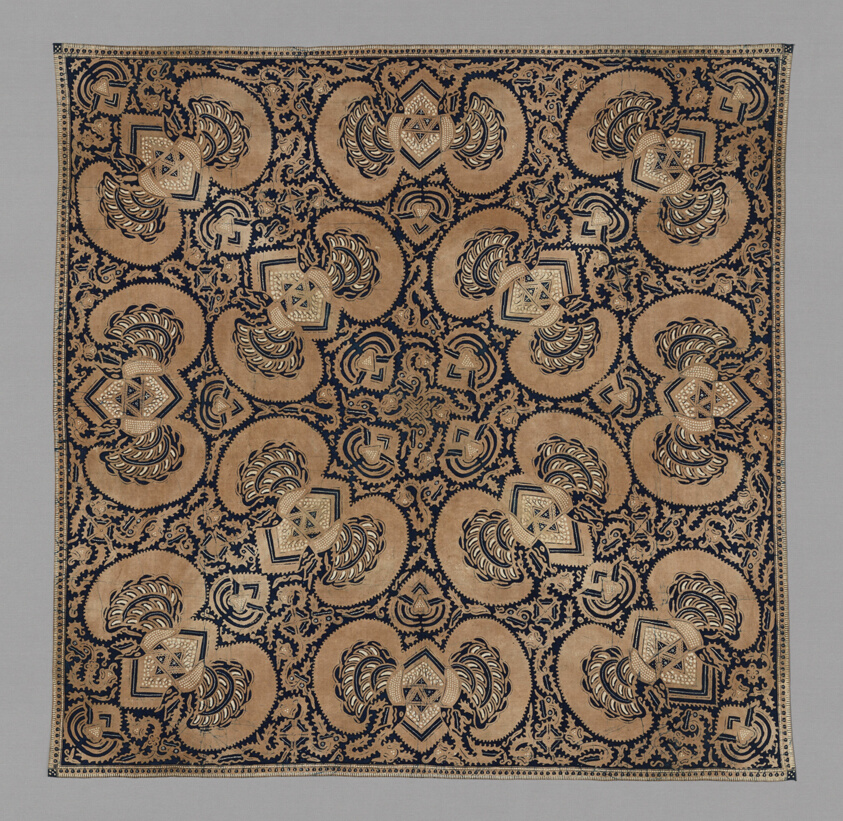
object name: Costume and Accessories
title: Iket (Headcloth)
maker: Indonesia, Java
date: 19th century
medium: Cotton, batik dyed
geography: Java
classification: textile; weaving; weaving - printed; costume; dress (garment); clothing